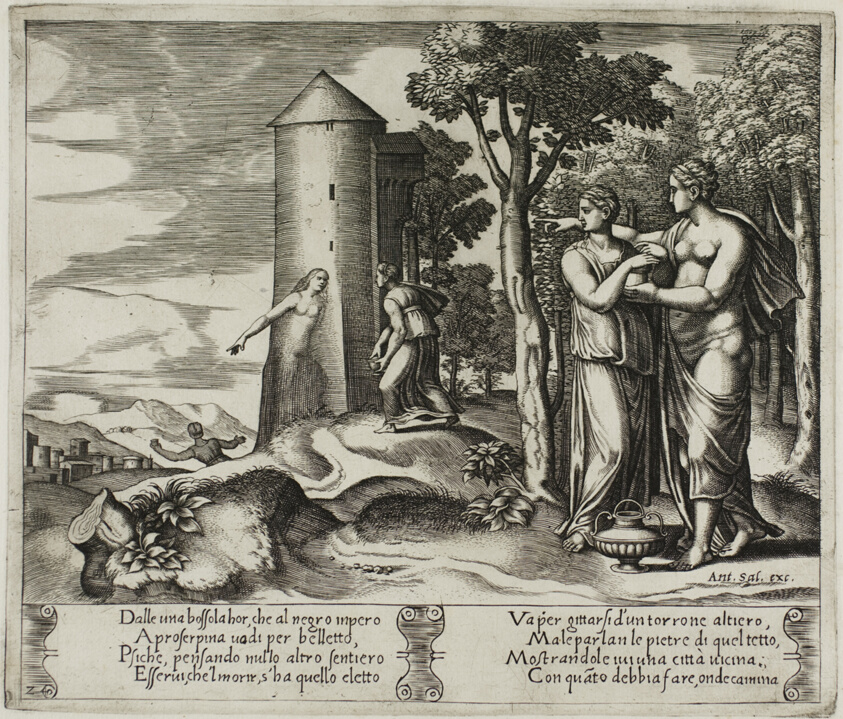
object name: Print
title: Psyche Leaves for the Underworld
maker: Master of the Die (Italian, active c. 1530-1560); after Michiel Coxcie I (Flemish, 1499-1592); in turn, inspired by Raffaello Sanzio, called Raphael (Italian, 1483-1520)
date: 1530/40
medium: Engraving in warm brown ink on cream laid paper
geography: Italy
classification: engraving; print; prints and drawing